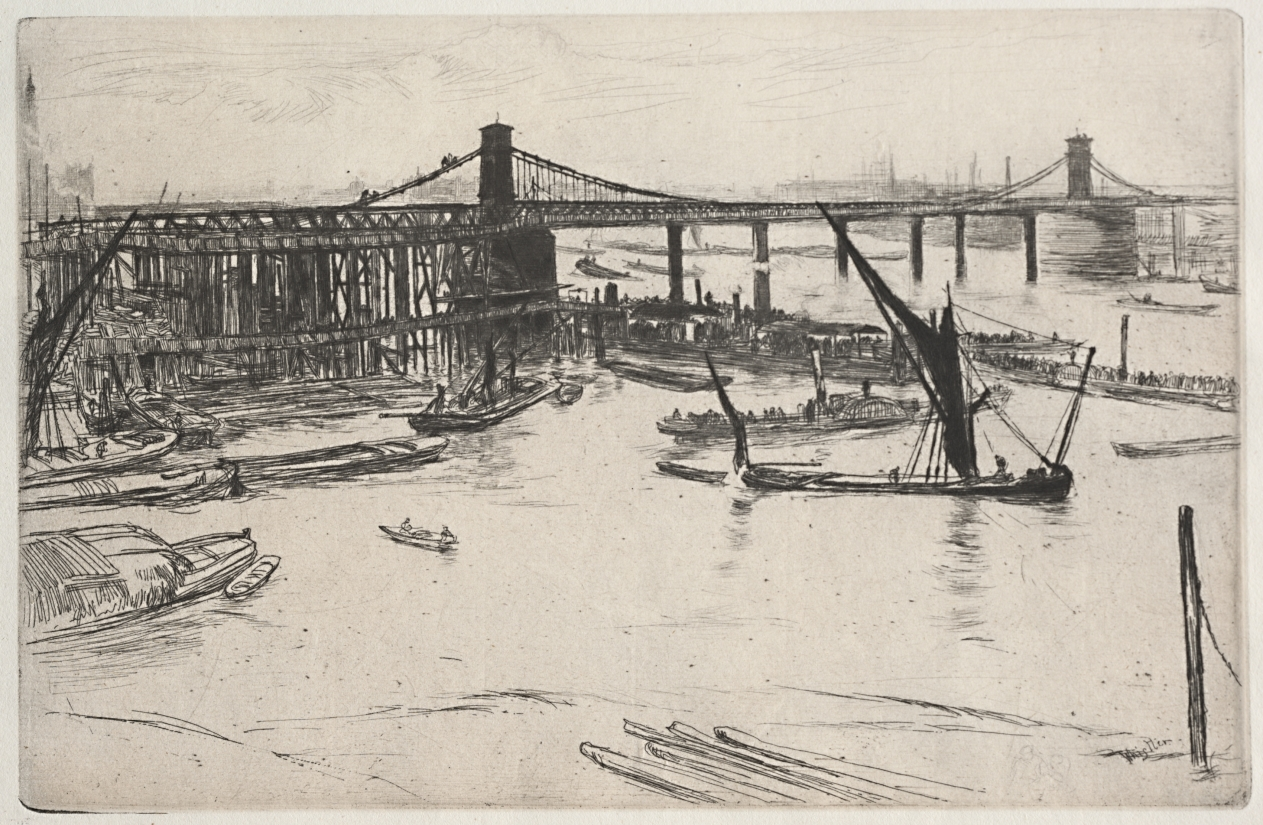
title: Old Hungerford Bridge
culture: America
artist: James McNeill Whistler (American, 1834–1903)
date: 1861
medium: etching and drypoint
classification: Print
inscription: signed lower right on plate: Whistler